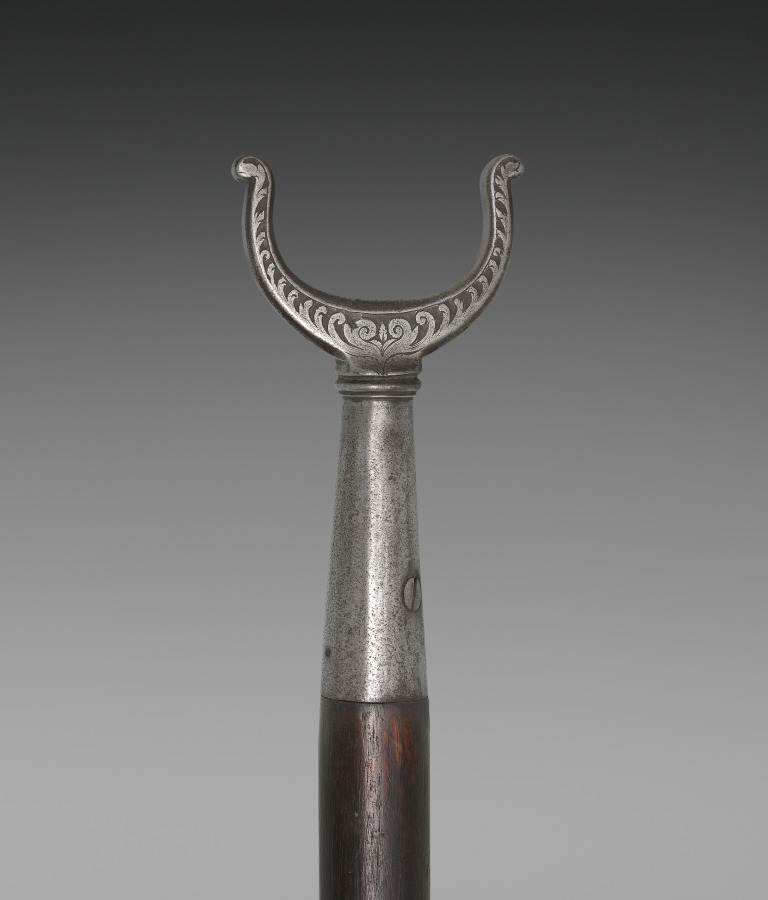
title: Gun Rest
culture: Italy, 17th century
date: 1600s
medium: steel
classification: Arms and Armor